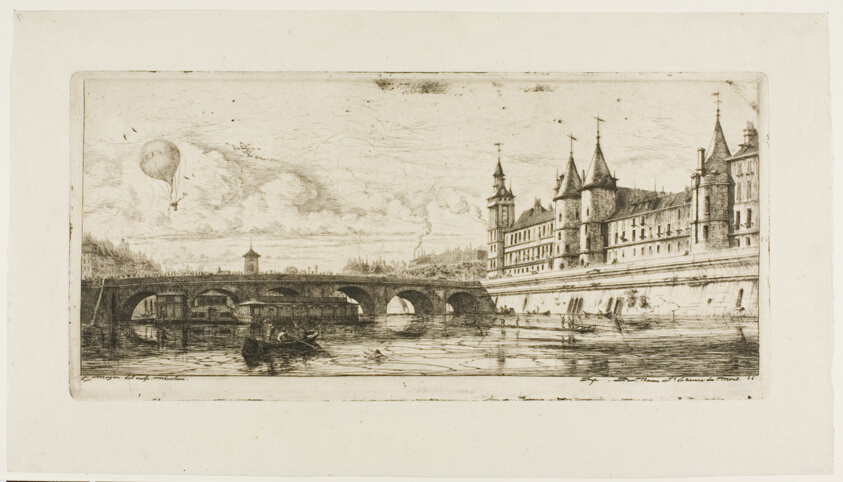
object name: Print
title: Pont-au-Change, Paris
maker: Charles Meryon (French, 1821-1868)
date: 1854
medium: Etching on ivory laid chine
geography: France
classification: etching; print; prints and drawing